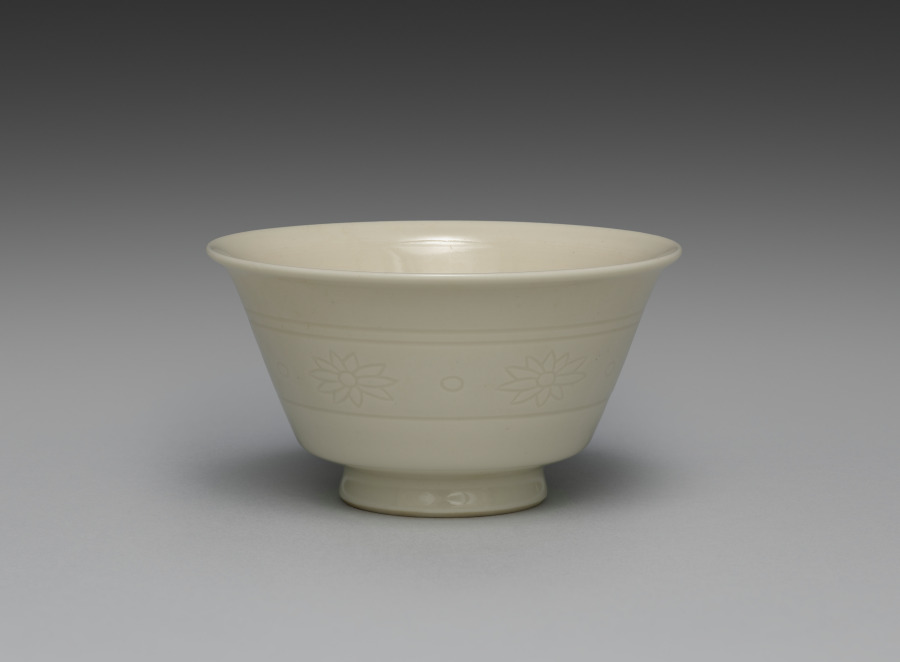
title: Teacup from Teacups with Floral Band Motif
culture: Japan, Meiji period (1868–1912)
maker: Seifū Yohei III (Japanese, 1851–1914)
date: 1893–1914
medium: One from a set of five cups; porcelain with incised decoration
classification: Ceramic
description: The five sencha teacups in this set are decorated with incised flowers and dots between a double band at the top and a single band at the bottom. They are in Yohei III’s creamy taihakuji body and glaze. In their motifs, they are quite similar to an incense burner by Yohei III (see CMA 2022.180), but the flowers are even more simple in design, with no open circle at the center. A label affixed to the side of the box refers to them as “sencha cups in emulation of Korean white [ware].” The reference to Korean ware indicates that even though Yohei was more directly inspired by Qing-dynasty wares from the Dehua kilns in Fujian Province in developing his porcelain clay and glaze for works such as these, the general understanding of the continental models still placed them, at least in terms of color, among pieces broadly associated in Japan with Korean white wares. The delicate cups are thinly potted, so they have a highly desirable translucency.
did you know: The delicate cups in this set are thinly potted, so they have a highly desirable translucency.